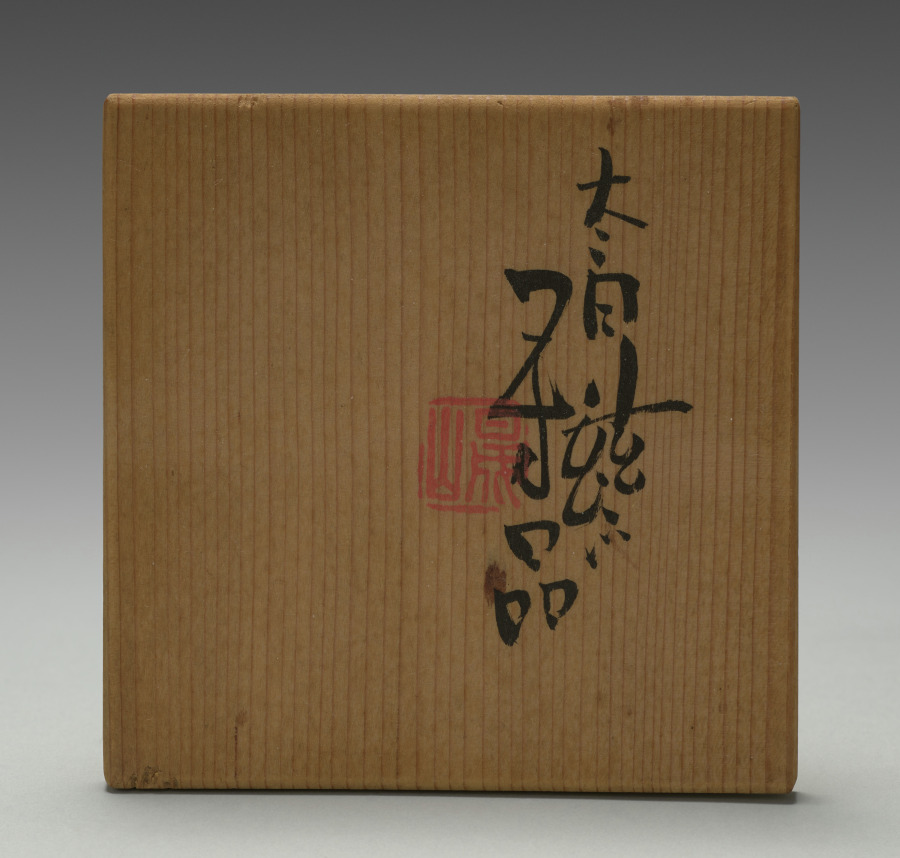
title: Hand-held Teapot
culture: Japan, Meiji period (1868–1912)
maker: Seifū Yohei III (Japanese, 1851–1914)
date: 1893–1914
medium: Porcelain with molded and carved design and cream glaze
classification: Ceramic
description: This teapot is of a variety used by advanced sencha practitioners. Called a hōhin, the pot is designed to be held directly by the fingers, with the body touching the upper part of the palm. This shape allows the host to manipulate the pot with a single hand and demonstrate dexterity. Direct contact between the ceramic body and the hand allows the host to closely gauge the temperature of the water within. There are differing grades of sencha, and for the finest one, gyokuro, the water temperature must be carefully regulated to achieve the proper flavor. This vessel is therefore efficacious for preparing this high-quality tea. The hōhin is also extremely portable, so it is well suited for impromptu gatherings. According to its box, this teapot is an example of taihakuji. “Great-white porcelain” was an important early invention Yohei III devised in 1972. It involved the combination of a distinctive translucent, creamy glaze over an ivory-colored clay body.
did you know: This pot’s restrained design includes on the lid’s handle a yin-yang motif, symbolizing the ideal balance between the forces of the universe.